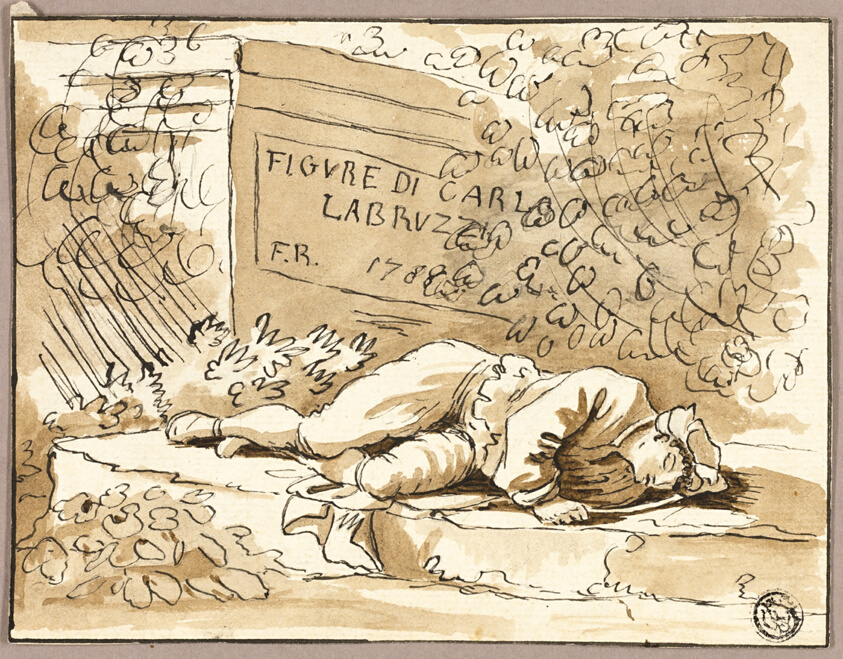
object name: Drawing and Watercolor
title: After Frontispiece to 'Figure'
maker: Carlo Labruzzi (Italian, 1769-1830)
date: c. 1788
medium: Pen and black ink, with brush and brown wash, on cream laid paper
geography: Italy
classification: pen and ink drawings; drawings (visual works); prints and drawing